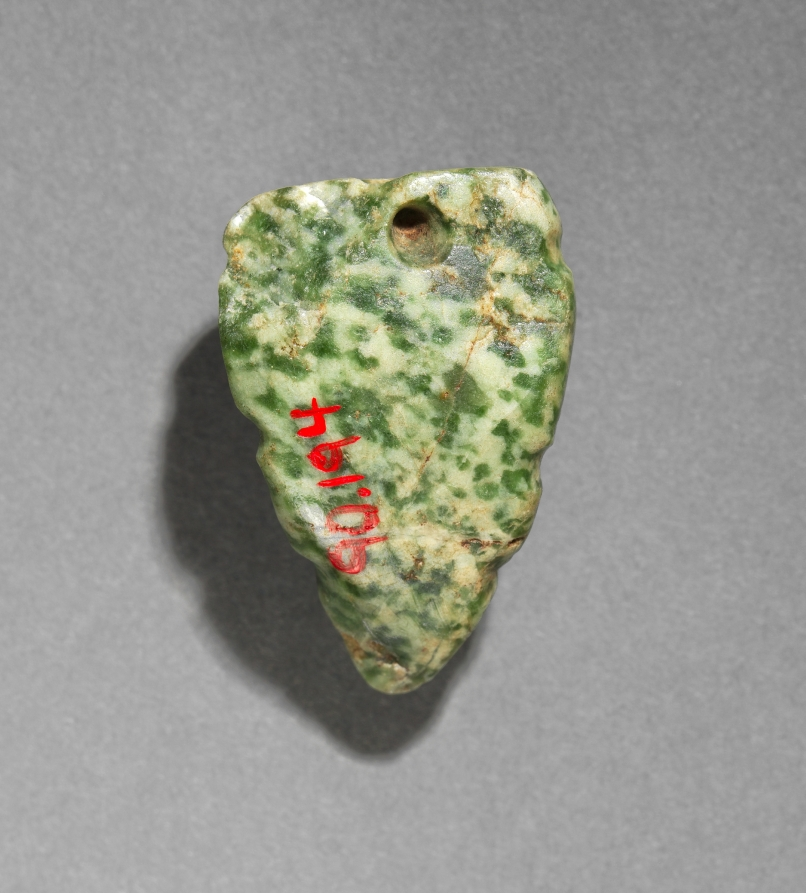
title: Head Pendant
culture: Mesoamerica, Mexico, Guerrero, Mezcala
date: 100 BCE–300 CE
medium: polished green stone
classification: Sculpture